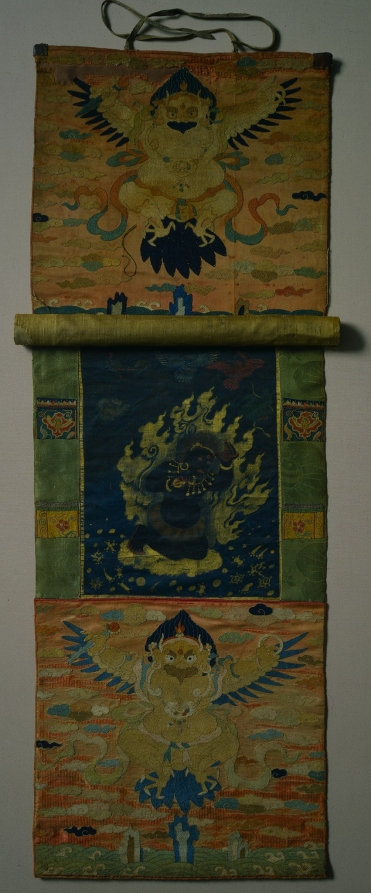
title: Vajrapani and Garuda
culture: China and Tibet, Embroidery: China, Yuan dynasty (1279–1368); painting: Tibet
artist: attributed to Choying Dorje, the Tenth Black Hat Karmapa (Tibetan, 1604–1674)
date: painting c. 1650; top and bottom borders c. 1350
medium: Painting: gum tempera, gold, and silver on silk; lateral borders: silk damask with needleloop embroidery; top and bottom panels: embroidered silk, lead, and silver paper; curtain: silk tabby; dowels: wood, rawhide, and leather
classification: Embroidery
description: The painting depicts the Buddhist protector who holds (pani) the thunder bolt (vajra) in his right hand. He kneels in reverence and holds his left hand in a gesture of salute. This unusual image appears to have been the vision of a Tibetan monastic patriarch known for creating his own inventive paintings and sculptures. Sewn to the painting are Chinese damask borders and rare embroideries dating to the Chinese Yuan dynasty (1279–1368). They depict man-eagle figures known as Garuda, a form occasionally assumed by Vajrapani.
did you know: Vajrapani sometimes takes the form of Garuda, enemy of snakes.